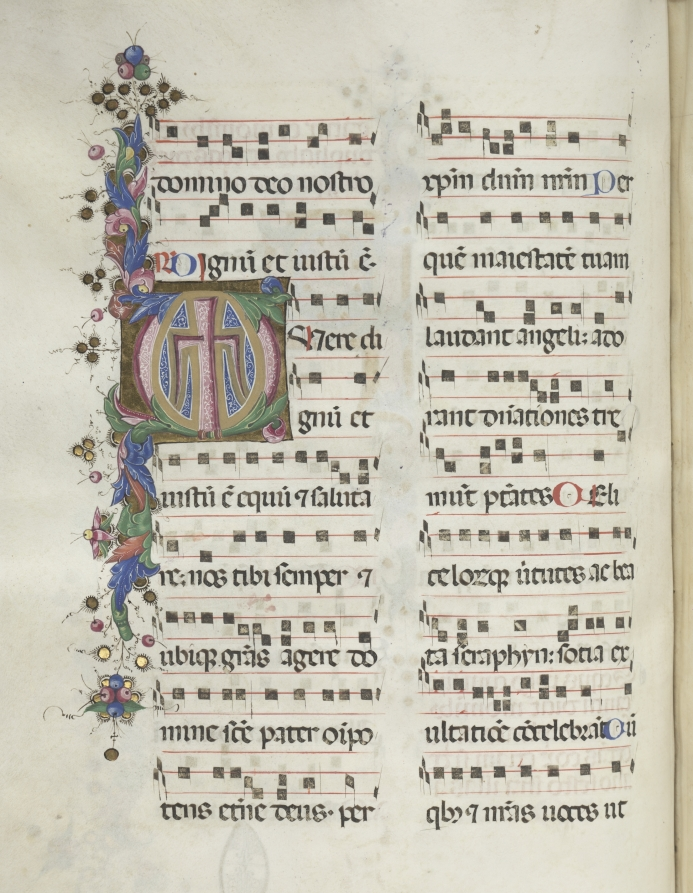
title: Missale: Fol. 184v: Cross, Foliage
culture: Italy, Perugia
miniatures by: Bartolommeo Caporali (Italian, c. 1420–1503)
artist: assisted by Giapeco Caporali (Italian, d. 1478)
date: 1469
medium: ink, tempera and burnished gold on vellum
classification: Bound Volume